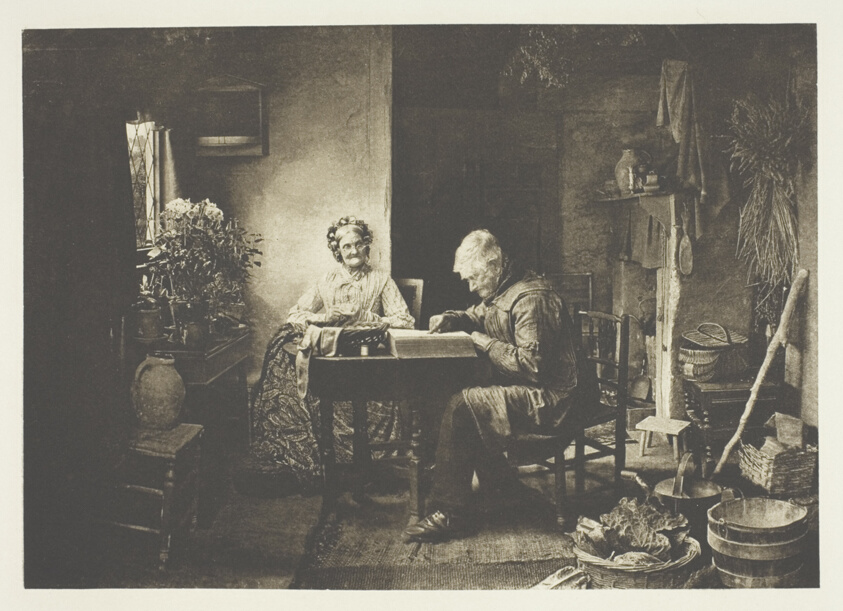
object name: Photograph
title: When the Day's Work is Done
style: Pictorialism, 19th century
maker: Henry Peach Robinson (English, 1830–1901)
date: 1877, printed January 1890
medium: Photogravure, from "Sun Artists, Number 2" (1890)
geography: England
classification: photogravure; photomechanical process; photography; photograph